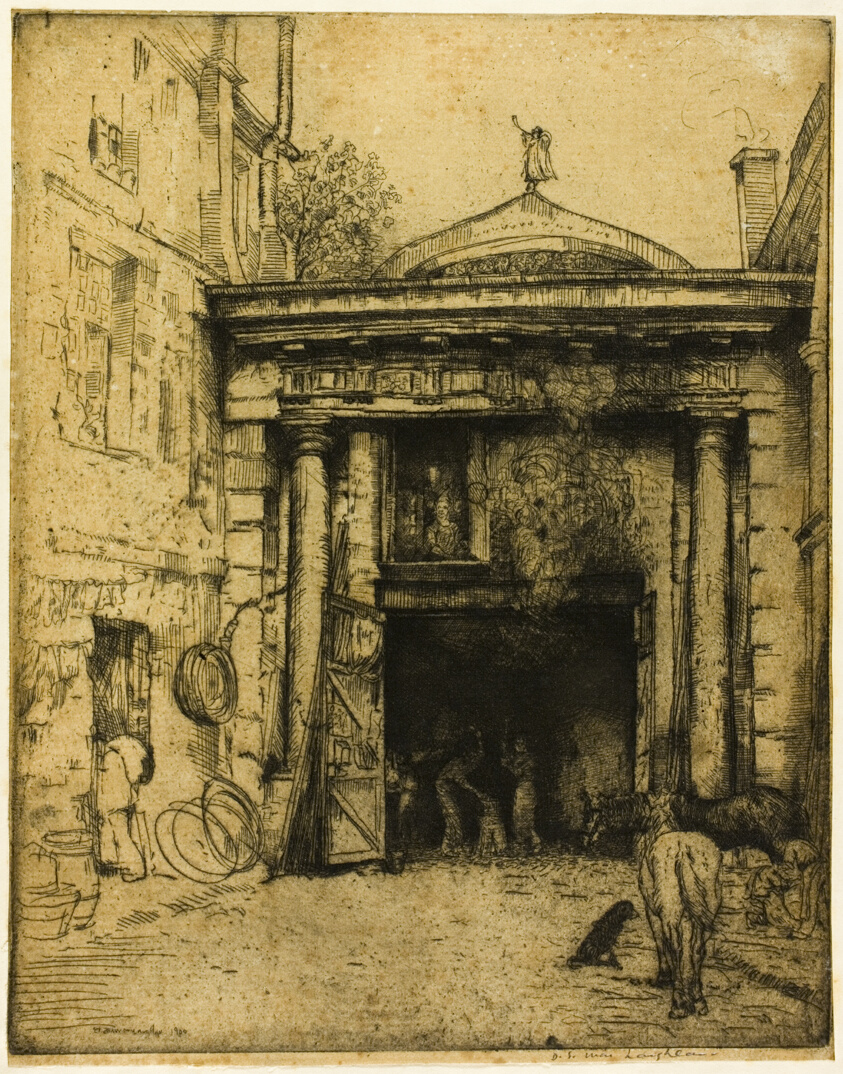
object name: Print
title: Forge of the Carmelites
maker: Donald Shaw MacLaughlan (American, born Canada, 1876-1938)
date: 1900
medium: Etching in black on tan laid paper, laid down on off-white wove paper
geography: United States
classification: etching; print; prints and drawing